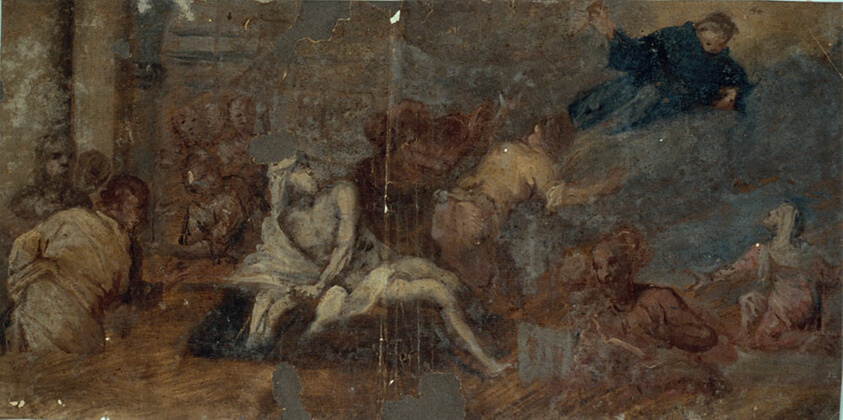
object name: Drawing and Watercolor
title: Saint Anthony Appearing to a Sick Man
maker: Follower of Domenico Robusti, called Tintoretto; Italian, 1560-1635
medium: Oil paint on tan laid paper, laid down on gray-brown card, laid down on album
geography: Italy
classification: oil paintings (visual works); drawings (visual works); prints and drawing